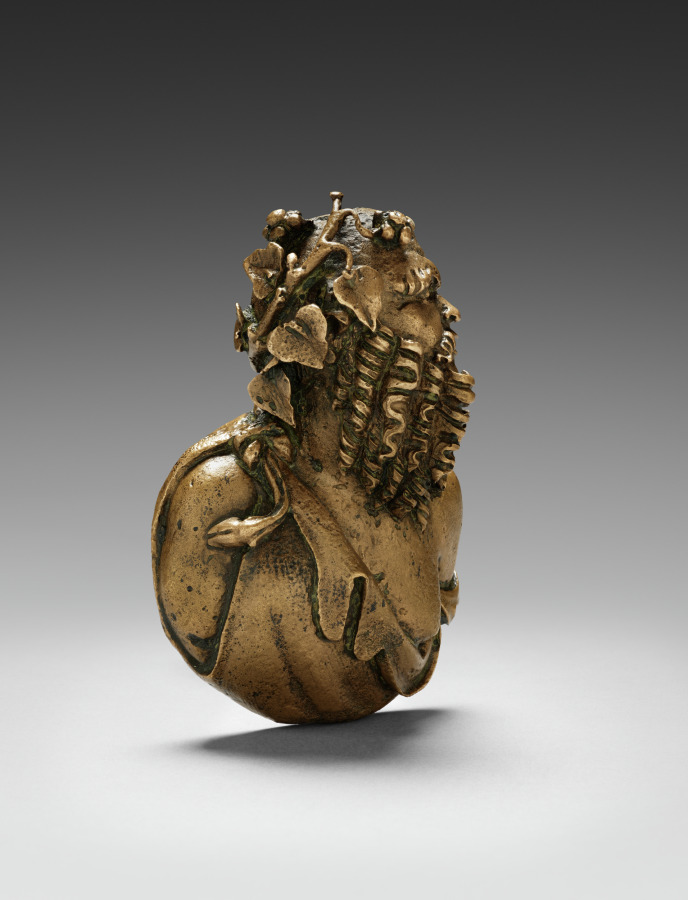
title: Silenus Bust for a Couch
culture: Italy, Roman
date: 1–125 CE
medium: bronze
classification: Sculpture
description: This bust of Silenus was part of the fulcrum or armrest of an ancient Roman couch. Silenus was the tutor and companion of Bacchus, the Roman god of wine. He is shown with a long curly beard, bushy eyebrows, and wearing a garland of ivy vines with berries. His deerskin robe, tied by the animal’s hoof, falls off his shoulder, suggesting drunkenness. The bust would have been placed at the base of the armrest where it met the seat of the couch, while an animal head likely decorated the top. As is the case with many Roman objects, Romans adapted their couch style and decoration from the Greeks.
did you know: This silenus’s beard is made up of exactly ten ringlets of curls.